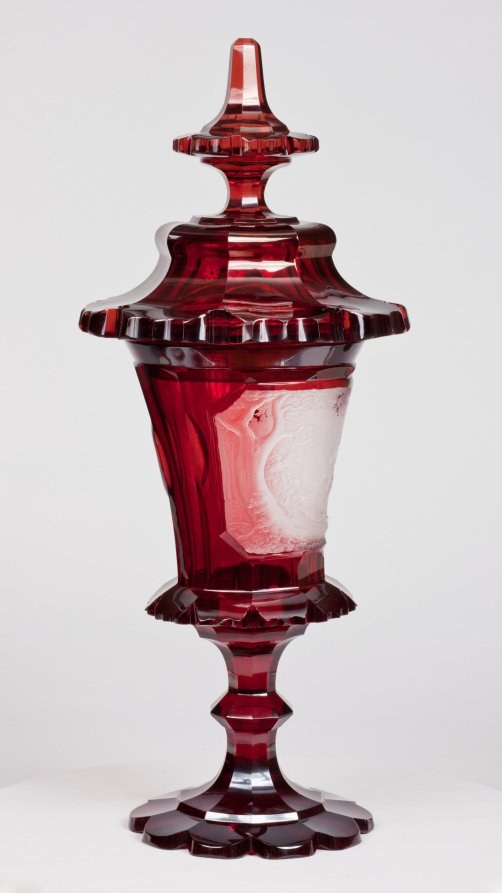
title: Covered Cup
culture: Bohemia, 19th century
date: mid-1800s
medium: ruby glass with engraved decoration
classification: Glass